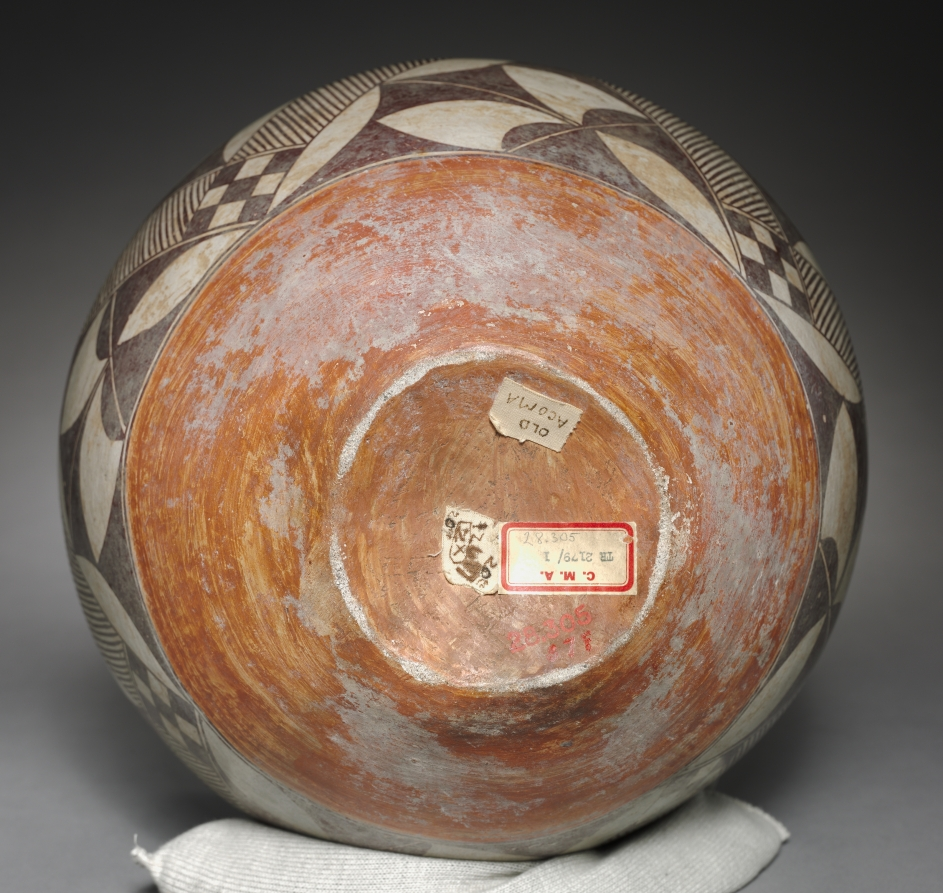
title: Water Jar (Olla)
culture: Native North America, Southwest, New Mexico, Acoma Pueblo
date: 1880s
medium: ceramic, slip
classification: Ceramic